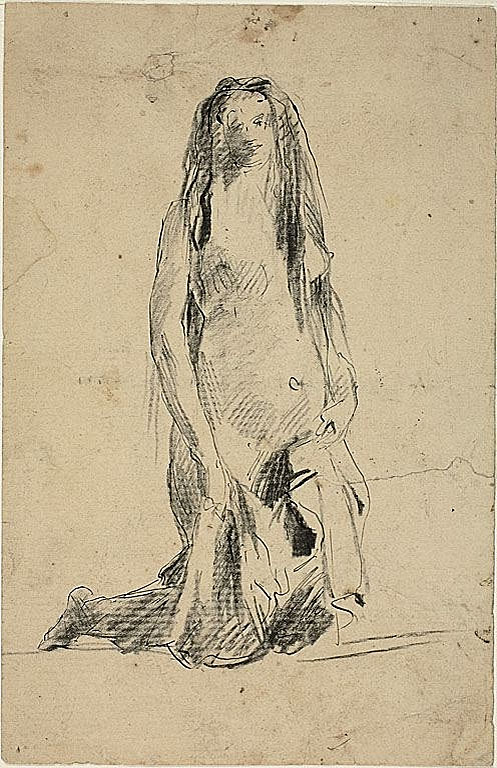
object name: Drawing and Watercolor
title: Kneeling Nude Woman with Drapery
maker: Jean Baptiste Carpeaux (French, 1827-1875)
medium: Pen and blue ink and black crayon on buff laid paper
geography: France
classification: crayon; drawings (visual works); prints and drawing